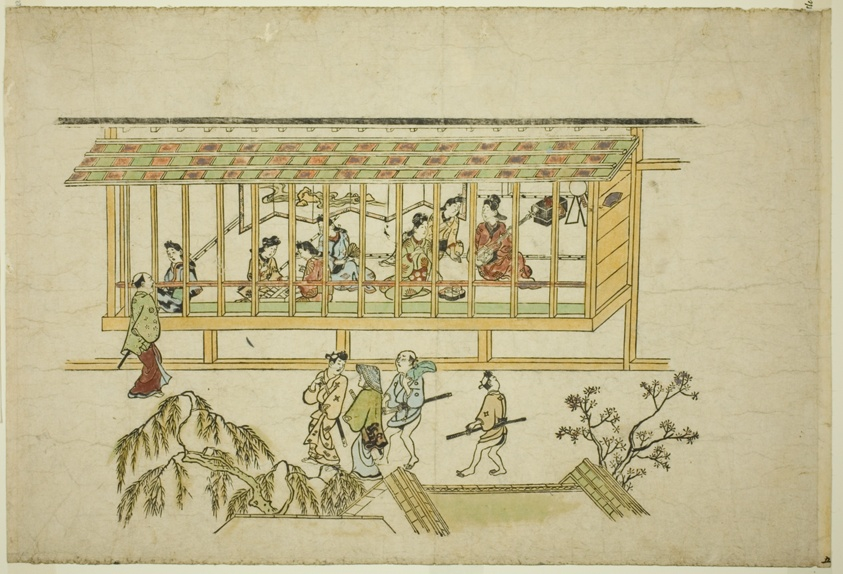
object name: Print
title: A House of Courtesans, from the series "The Appearance of Yoshiwara (Yoshiwara no tei)"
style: Japanese (culture or style)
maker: Hishikawa Moronobu (Japanese, (?)-1694)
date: c. 1681/84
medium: Hand-colored woodblock print; oban, sumizuri-e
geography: Japan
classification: woodblock print; print; asian art